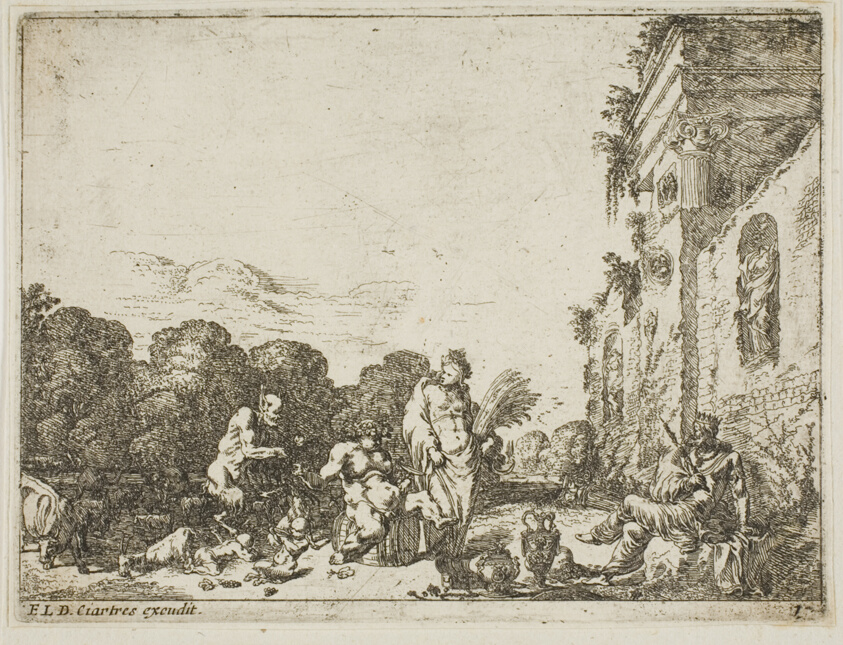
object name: Print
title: Bacchanalian Scene with Allegorical Figures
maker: Johann Wilhelm Bauer (German, 1607-1642)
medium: Etching on paper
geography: Germany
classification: etching; print; prints and drawing